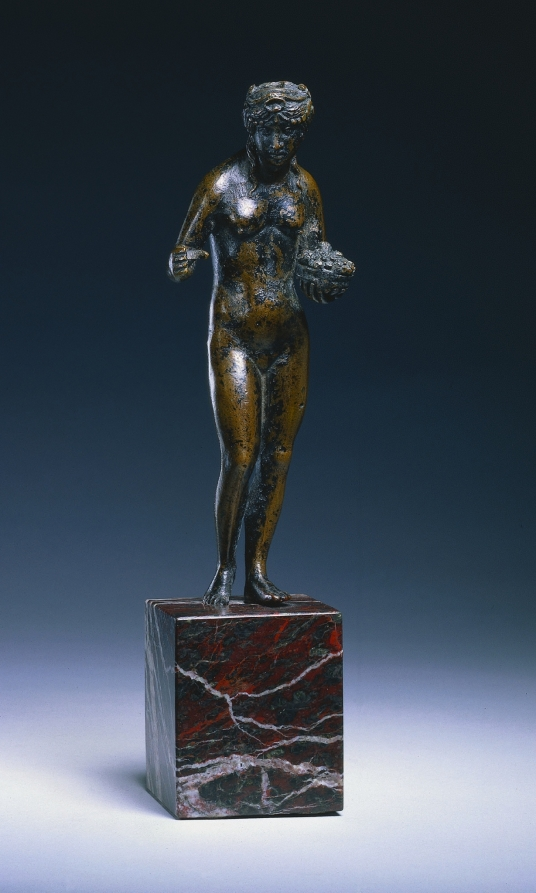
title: Pomona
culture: Italy, early 16th Century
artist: circle of Andrea Riccio (Italian, c. 1470–1532)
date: c. 1500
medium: bronze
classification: Sculpture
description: According to Roman mythology, the nymph Pomona cared for the gardens and forests, rejecting the pursuits of her suitors. The god Vertumnus fell in love with her. He disguised himself as an old woman, complimented her orchard and kissed Pomona passionately. As an old woman, Vertumnus explained that there was one person who loved both Pomona and her garden. Vertumnus then revealed himself to her, and from then on the two cared for Pomona's gardens together. Classicizing in style, Pomona stands nude with her weight on her left leg. She holds a bowl of fruit in her left hand while her right hand is clenched, suggesting it may have once held another object. Pomona wears a diadem, or headband, and hair decorated with a beaded garland falls in two locks over her shoulders. A hole has been drilled at the top of the figure's head for removal of the core and casting pins appear in the back of the right shoulder and on the front of the left leg. Other examples of this statuette exist in Oxford, Paris, Berlin and Washington. Only the Washington and Cleveland versions have been attributed to Riccio because of their superior quality of casting and the rich patinas.